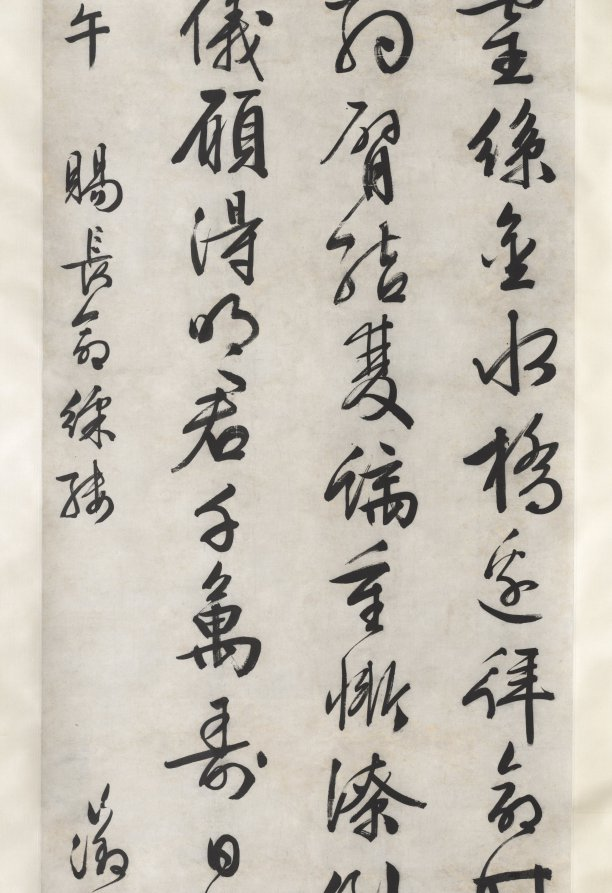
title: Poem on Imperial Gift of an Embroidered Silk: Calligraphy in Running-Standard Script (xingkaishu)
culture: China, Suzhou, Ming dynasty (1368-1644)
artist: Wen Zhengming (Chinese, 1470–1559)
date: c. 1525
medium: Hanging scroll; ink on paper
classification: Calligraphy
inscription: The text of the calligraphy, which is also included in Wen Zhengming's literary compilation, can be translated as follows: From the throne, this exquisite silk was bestowed on me,/ As I expressed my gratitude to His Majesty by the Goldwater Bridge./ This heavenly silk is embroidered with five colors./ Resplendent it is, draping over my arm with [designs of] twin dragons./ Having received such a gift, I [bowed] in shame over my lack of achievements./ Humbly I returned to my rank to observe the grand ceremony./ I wish His Majesty shall live on for myriad years,/ And the sun will always shine upon His trailing robe.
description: A poem by the influential Wen Zhengming from Suzhou in southeastern China expresses Wen’s gratitude to the Jiajing emperor (reigned 1522–67) for a gift of embroidered silk bestowed in appreciation of his commendable service. The elegant, well-composed, and energetically written large characters in deep black ink reflect the handwriting of a distinguished scholar-artist. Works of calligraphy by Wen of this large scale are rare. The poem reads: As I expressed my gratitude to His Majesty by the Goldwater Bridge. This heavenly silk is embroidered with five colors. Resplendent it is, draping over my arm with [designs of] twin dragons. Having received such a gift, I [bowed] in shame over my lack of achievements. Humbly I returned to my rank to observe the grand ceremony. I wish His Majesty shall live on for myriad years, And the sun will always shine upon His trailing robe.